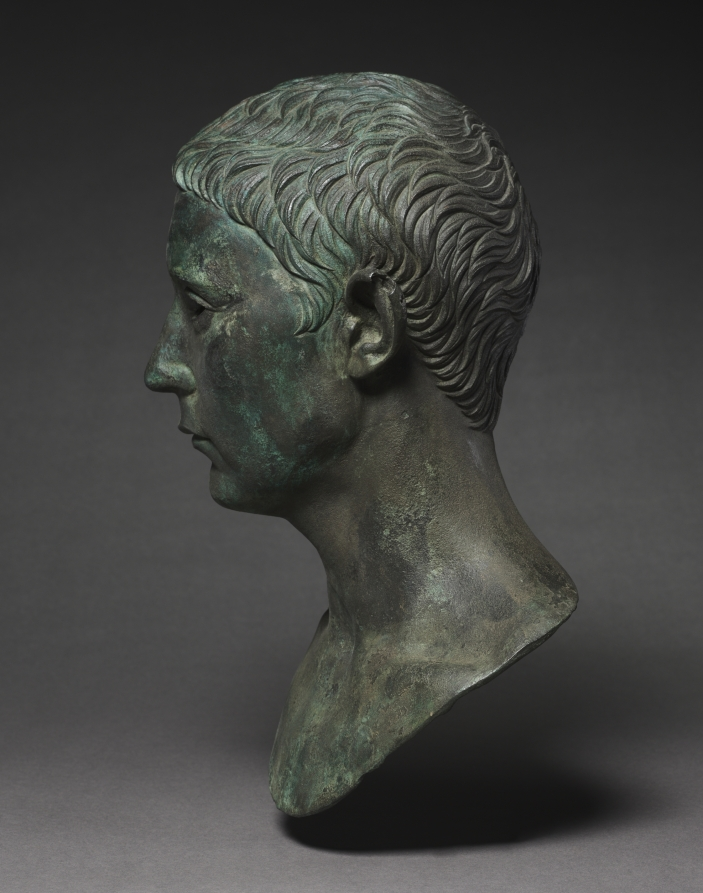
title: Portrait Bust of a Man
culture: Italy, Roman, Augustan period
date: 27 BCE–14 CE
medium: bronze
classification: Sculpture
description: The realistic features of this fine life-sized portrait include wrinkles in the forehead and beside each eye, and very naturalistic ears, protruding but not quite symmetrical. The stylized hair is neatly arranged and suggests a date in the Augustan period, although some scholars have seen it as late Republican. Likely once topping a shaft as a herm bust, the portrait’s subject—now unknown—would have been identified by an inscription.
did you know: This portrait originally had inlaid eyes, probably in stone, glass, or ivory.